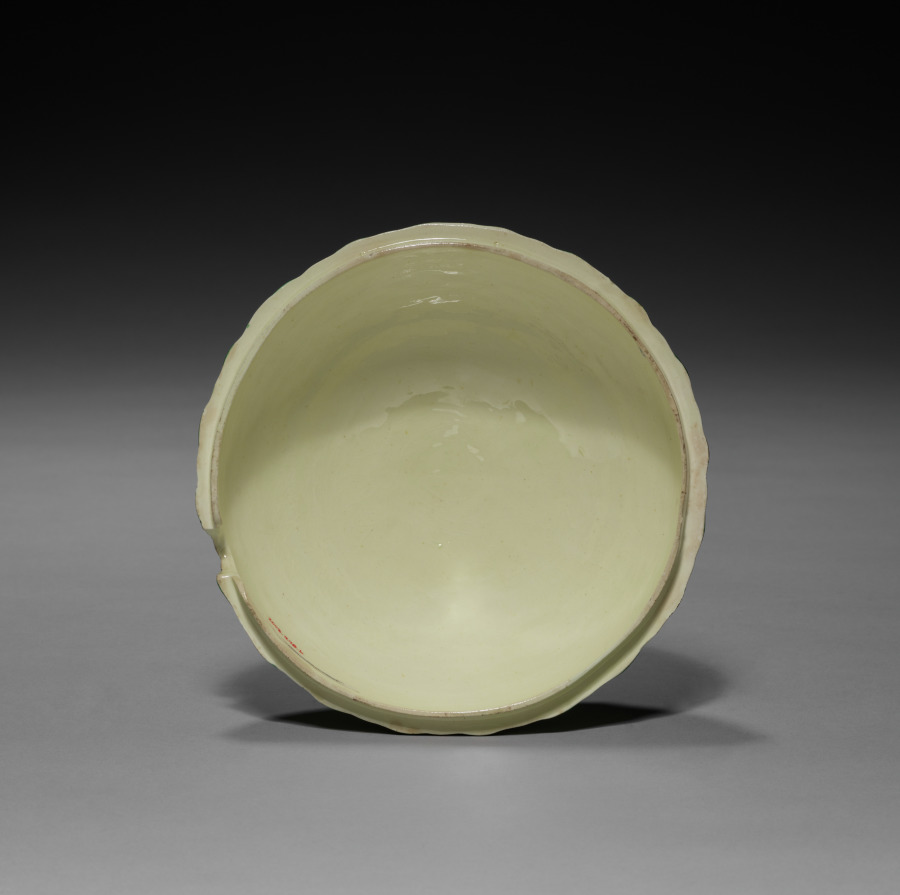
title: Cover for a Wicker-Work Sauce Tureen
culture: England, 18th-19th century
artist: Wedgwood Factory (British)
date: c. 1780–1840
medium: earthenware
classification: Ceramic